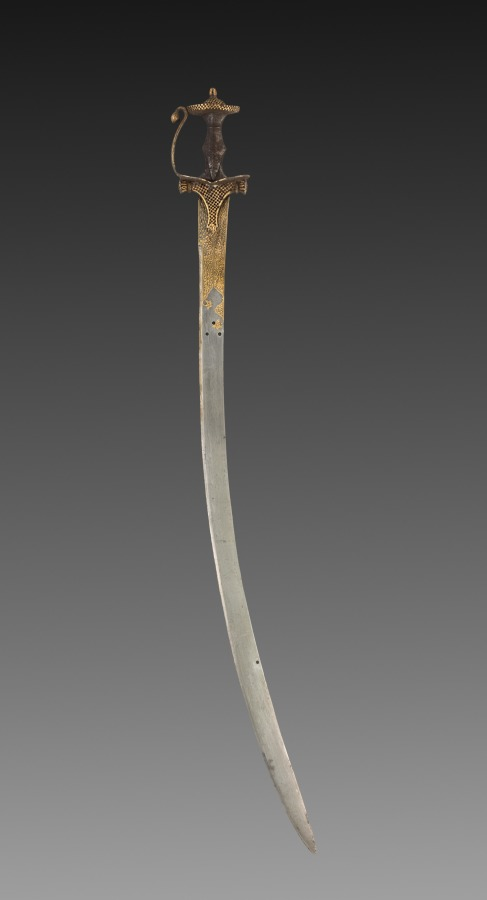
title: Tulwar Sword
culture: India, probably Deccan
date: 1700s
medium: Iron hilt with gold; steel blade with gold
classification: Arms and Armor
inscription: Help [comes] from God, and Victory is imminent.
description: This long curved sword and scabbard are of the kind used and worn by Mughal nobility, as seen often in paintings. The openwork hilt is a characteristic of swords from the southern Indian region known as the Deccan. By the end of the 1500s, the Mughals began making regular incursions into the Deccan as they attempted to expand their empire, increasing the exchange of art forms. Repeated four times, twice on one side of the blade and twice on the other in gold inlay, is the same line from the Qur'an 61:13: “Help [comes] from God, and Victory is imminent.” This is a popular inscription on daggers, banners, and other instruments of war, as it reassures the combatants that God is on their side, and therefore they can in good faith expect a speedy victory if they fight valiantly.